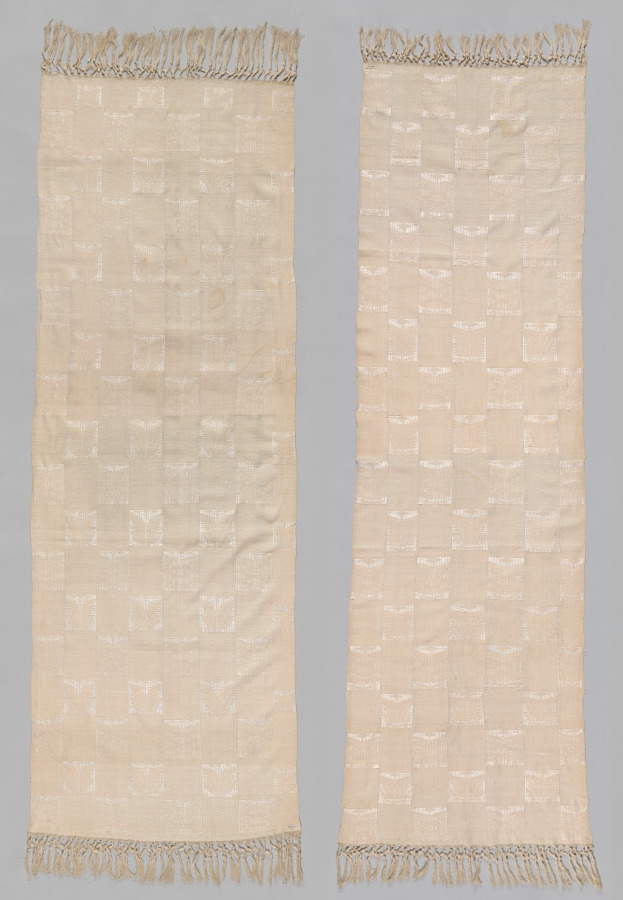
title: Pair of shawls (Lamba Landy Fotsy)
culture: Africa, East Africa, Madagascar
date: 1900s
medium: Silk (Bombyx mori and Borocera cajani)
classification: Textile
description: A lamba is an untailored textile worn by all ages, classes, and genders across much of Madagascar. This is an example of a woman’s garment made after Queen Ranavalona II made Christianity the state religion of the Merina Kingdom. Soon after, all-white lamba became popular for both Sunday church and daily wear. Fotsy is white in the Malagasy language. Indicating its owner’s worldliness, the white-on-white patterns alluded to fashionable imported textiles with damask patterns.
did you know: Invented in the mid-1800s, shawls like this were popular until about 2000.